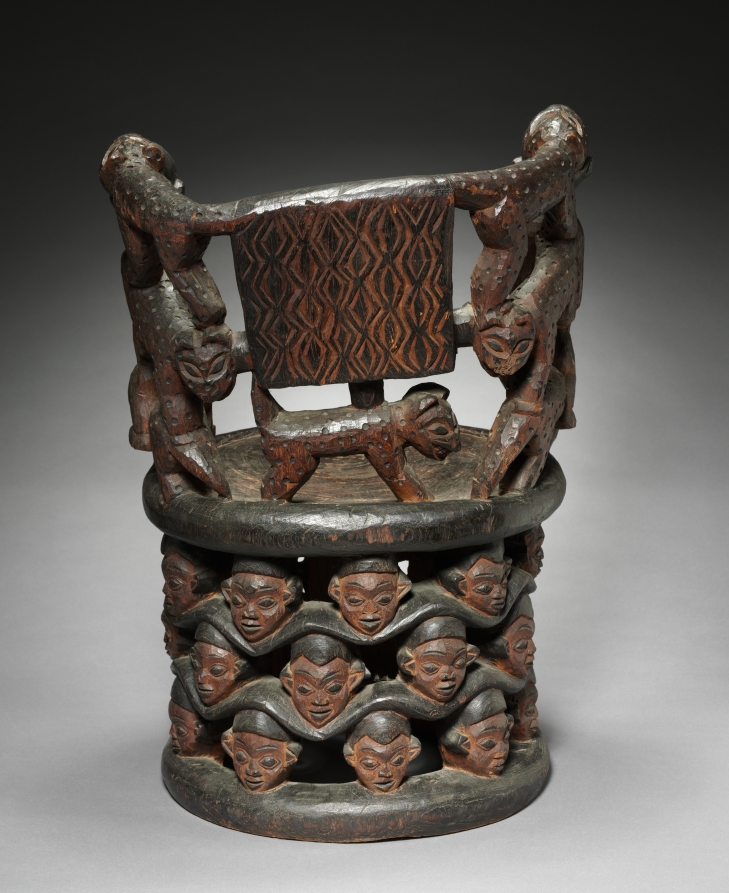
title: Prestige Chair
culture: Africa, Central Africa, Cameroon, Babanki-style maker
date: 1800s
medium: Wood and paint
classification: Furniture and woodwork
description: This stately chair attributed to the Babanki peoples of the Cameroon Grassfields features an unusual configuration of male and female figures. They are mounted on stylized leopards, animals revered as embodiments of power and royalty, which stand atop a base of three undulating rings bearing 24 heads. Chairs like this one serve as visual records that help mark kingships through the ages, conveying power and authority. The chair type was relatively common at the time; they were carved for sale to Europeans and local patrons, and also used as articles of royal gift exchange.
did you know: A British soldier acquired this work in Cameroon during the First World War.